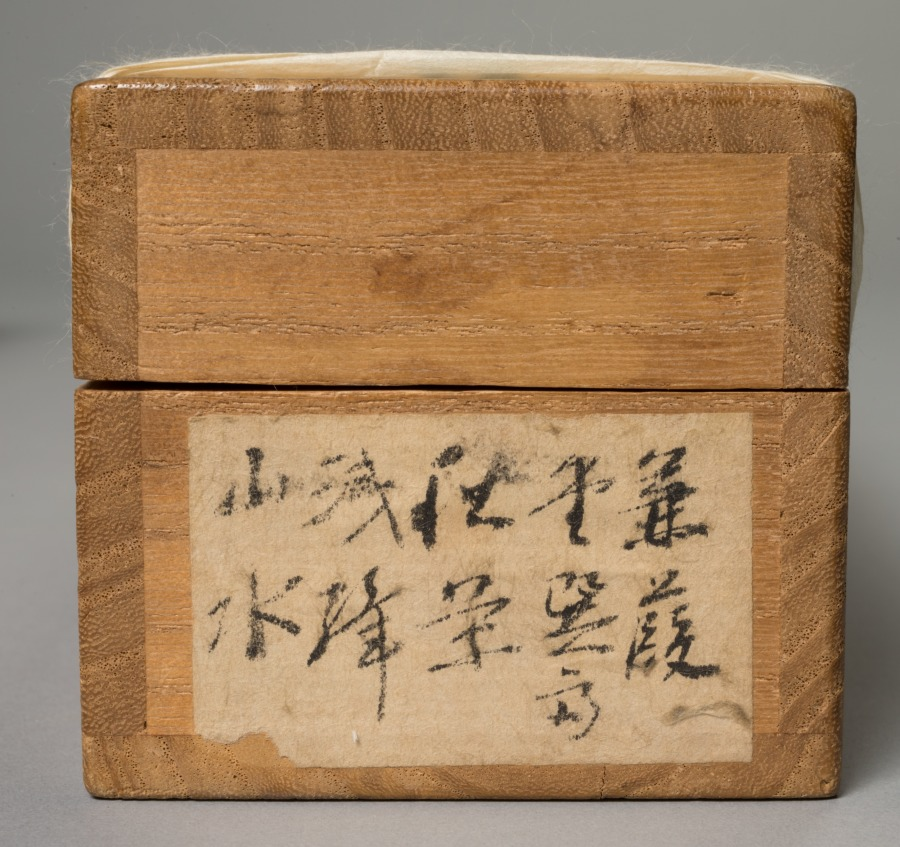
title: Landscape with Boaters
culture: Japan, Edo period (1615–1868)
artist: Kimura Kenkadō (Japanese, 1736–1802)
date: late 1700s–early 1800s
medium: hanging scroll; ink and slight color on paper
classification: Painting